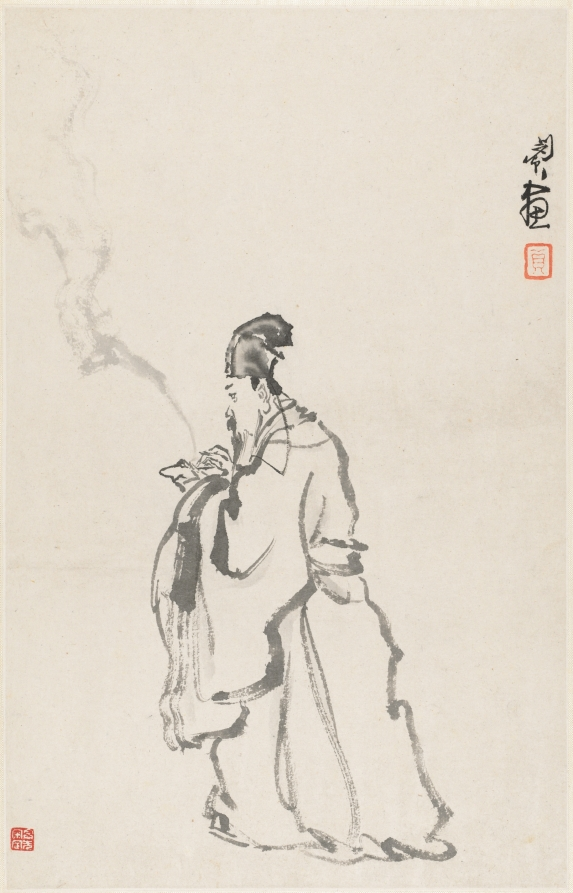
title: Su Dongpo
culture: China, Qing dynasty (1644-1911)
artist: Min Zhen (Chinese, 1730–after 1788)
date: 1788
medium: album leaf, ink on paper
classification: Painting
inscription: Inscription by Min Chen on the last leaf: I have a habit of collecting strange rocks. My friend Tai-li shan-jen* treasures my paintings as much as I treasure strange rocks. Once we agreed to exchange what we love with each other. However, my busy activities have kept me from carrying this out. This summer I realized that this strange rock has been sitting in my studio for five years, so I painted this to fulfill my old promise. As a record, I chose the grotesque cliff in the last scene of this twelve-leaf album. Cheng-chai, Min Chen inscribed this on the sixth day of the sixth month [July 9] of the wu-shen year [1788]. * Tai-li shan-jen is Wang Li [tzu: Li-fu] tr. Hou-mei Ishida Six seals appearing on the leaves: Min Chen, Cheng-chai, Ching-ch'iao, Chen, Liao-t'ang, Min Chen chih-yin.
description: Min Zhen, who was orphaned at age 12 and developed an eccentric personality, was trained by Tang Yin (1682–1756), a writer, playwright, and superintendent of the imperial porcelain workshops in Jingdezhen. The connection to him may have enabled Min to stay in Beijing for a decade from around 1773. It is not clear whether he ever resided in Yangzhou, but his style is in many instances reminiscent of that of Yangzhou artist Huang Shen. This album demonstrates Min’s versatility and mature style in the last years of his life.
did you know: Su Dongpo 蘇東坡 (1037–1101) is the likely model, but the gentleman is holding an incense burner instead of an ink stone more commonly associated with the famed poet.